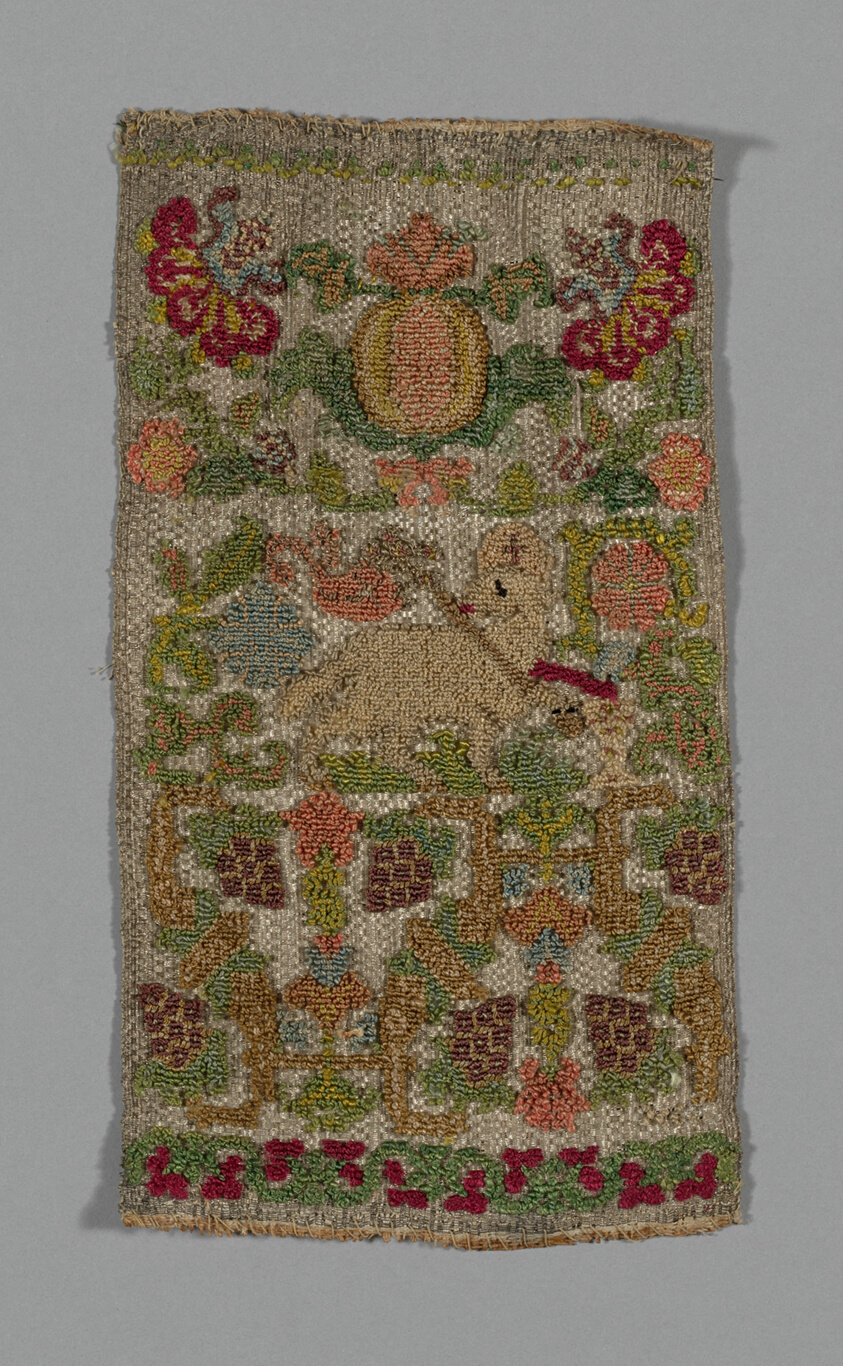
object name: Textile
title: Fragment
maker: Spain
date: 19th century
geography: Spain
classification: textile; weaving